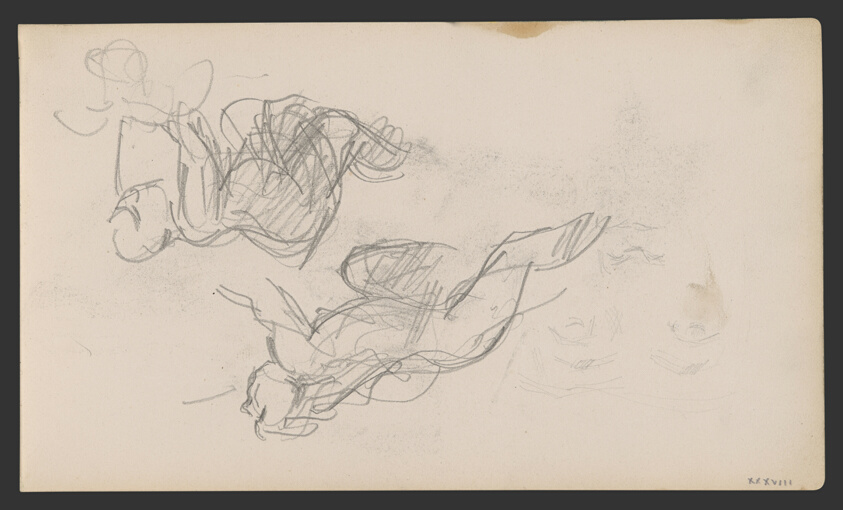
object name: Drawing and Watercolor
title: Sketchbook No. 2 (L'Estaque)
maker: Paul Cézanne; French, 1839-1906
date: 1875–86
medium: Graphite and pen and ink drawings on paper, bound into a book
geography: France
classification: sketchbook; graphite; prints and drawing; paper